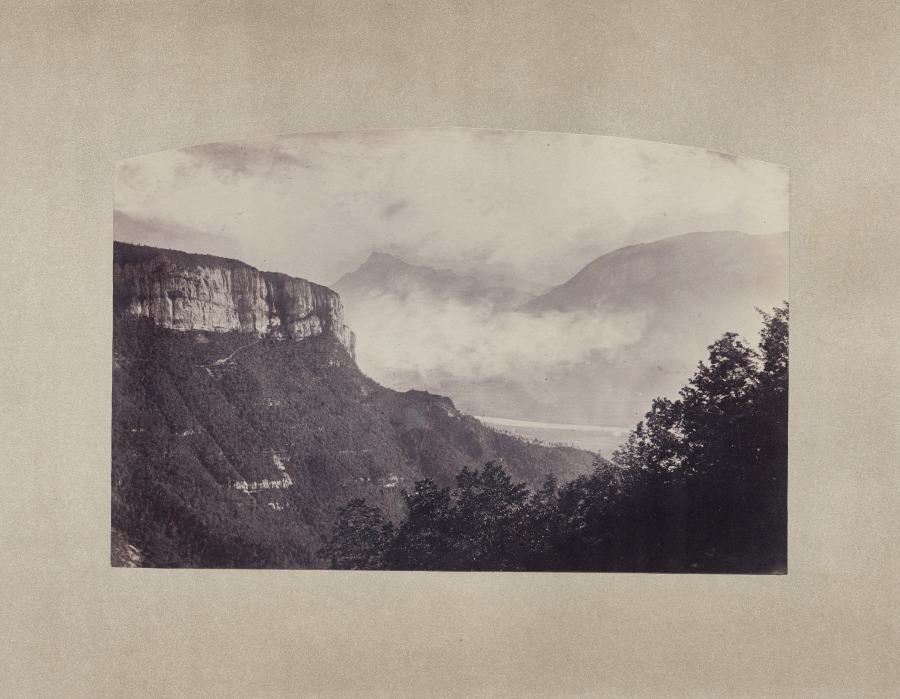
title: Vue prise du Couvent des Dominicains, Chalais (Isère), France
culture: France, 19th century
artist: Félix Thiollier (French, 1842–1914)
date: c. 1865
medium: albumen print from collodion negative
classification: Photograph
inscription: Written in graphite on recto of mount: “Prise du Covent des Dominicains-Chalais (Isere)”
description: Félix Thiollier brought to landscape photography the emotional power and mystery of the Barbizon and naturalist painters whom he collected and befriended. This dramatic view provides a deep vista more commonly found in photographs of the Western United States at the time. Underlying it, however, are a geometric structure of overlapping triangles, curved top border, and atmospheric clouds and mist that relate directly to precedents in painting.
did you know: Félix Thiollier, a wealthy industrialist, retired at 35 to pursue photography and local history.